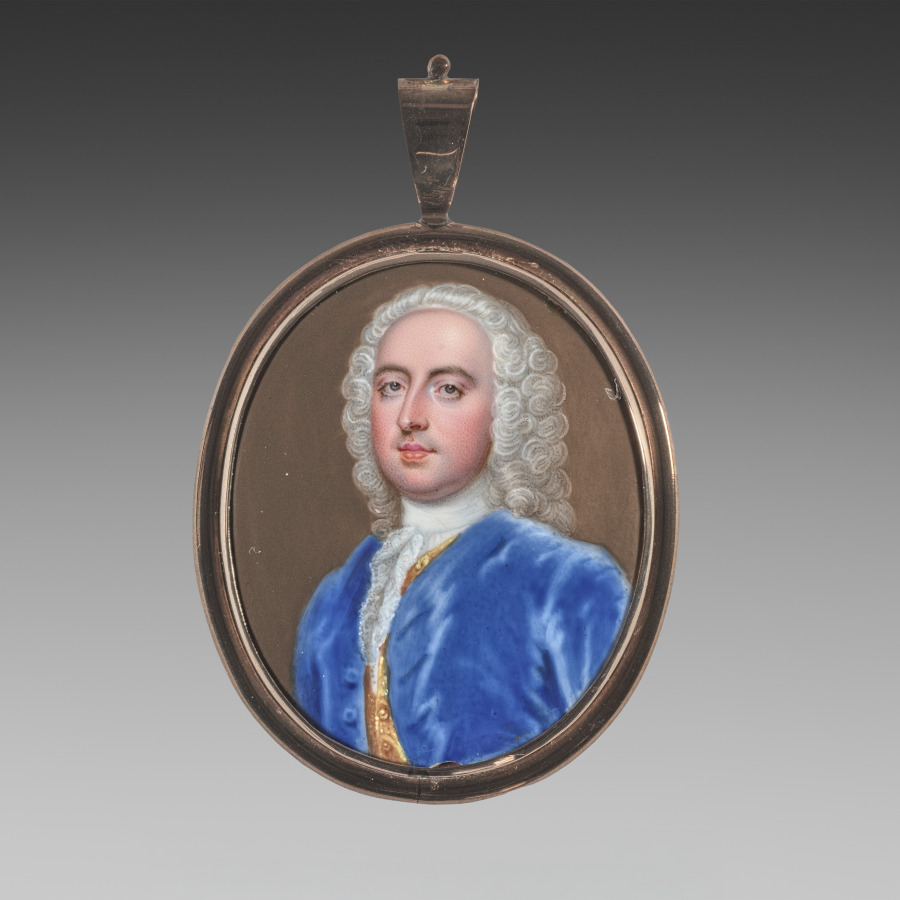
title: Portrait of a Man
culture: England, 18th century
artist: Christian Friedrich Zincke (German, 1683/85–1767)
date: c. 1735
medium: enamel on copper in a gold frame with a blue glass and hair reverse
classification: Portrait Miniature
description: The unknown sitter's shoulders are turned to the right, and he is painted almost full face. He wears a bright blue velvet coat with covered buttons, deep yellow embroidered waistcoat, and white stock collar with double lace frill down the front. His powdered wig falls to his shoulders. He has gray eyes and is clean shaven with rosy cheeks, and the background is dark brown. The miniature is set in a gold locket-style frame. The back displays a lock of dark brown hair inside a border of bright blue foiled glass—a popular framing style for miniatures in the late eighteenth and early nineteenth centuries and, therefore, surely a later addition. Since the publication of the Greene collection catalogue in 1951, the attribution of this miniature has been disputed, with experts alternately suggesting Christian Friedrich Zincke and possibly Charles Boit (1663–1727). The evidence in favor of Zincke, however, is far stronger than it is for Boit, who had not worked in England for over a decade before his death in 1727, several years before the most plausible date for this portrait. Among Zincke’s hallmarks are lips painted two different colors—here, purplish pink on top and orange on the bottom—a practice that became increasingly pronounced later in his career. This portrait also exhibits Zincke’s characteristic treatment of the eyes during this period: he framed the eyes with individually painted black dots to represent eyelashes. The counter-enamel is not inscribed but has the smooth appearance of the counter-enamels customarily associated with Zincke’s later career. A miniature identical in all but the facial features appeared at Christie’s, London, in 2004. Zincke often used this costume consisting of a blue (or sometimes brown) velvet jacket with covered buttons, yellow embroidered waistcoat, and frilled lace cravat. An example that sold at Christie’s in 1996 is signed and dated 1734. Another closely related and unsigned example by Zincke in the Metropolitan Museum of Art has been dated to c. 1745, indicating when this attire was frequently employed by Zincke’s studio.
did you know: Unlike fragile portrait miniatures painted in watercolor on vellum or ivory, which are prone to cracking, fading, and flaking, enamels are resilient, impervious to the effects of light, and retain their striking original colors over time.